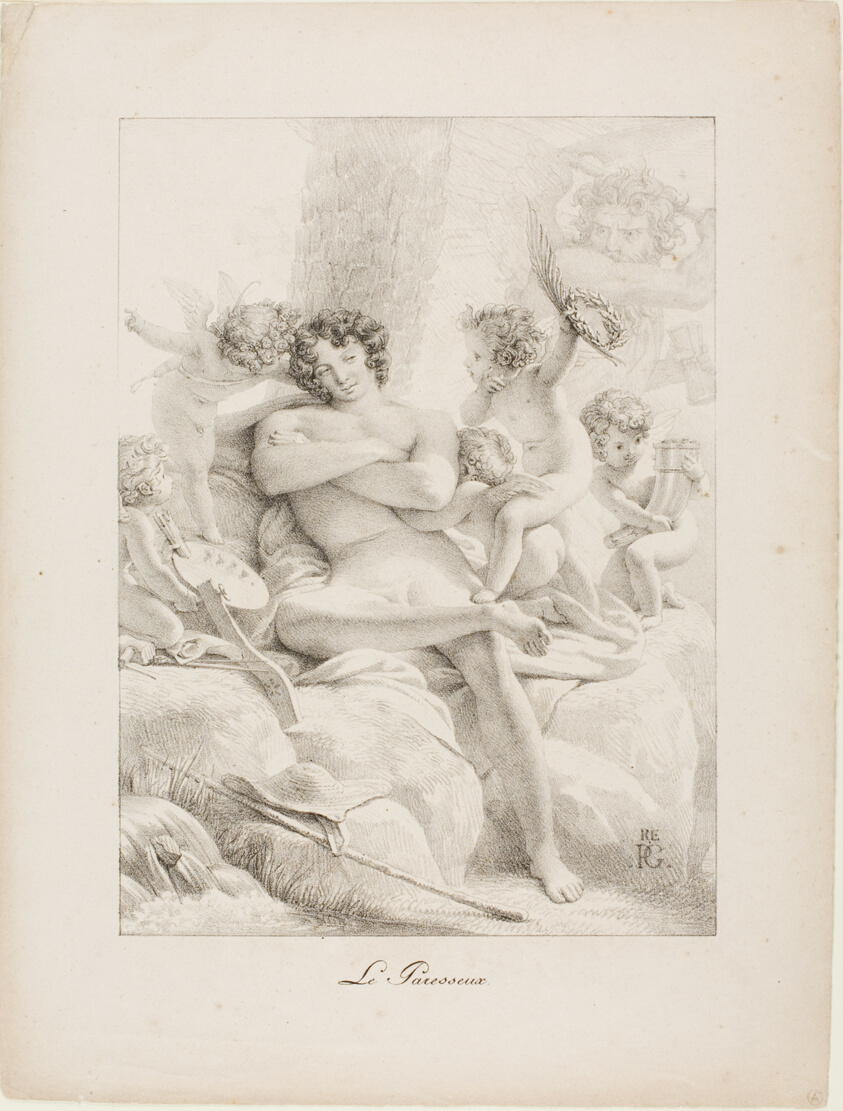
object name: Print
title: The Idler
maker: Pierre Guérin (French, 1774-1833); printed by Gottfried Engelmann (French, 1788-1839)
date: 1816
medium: Lithograph in black on pinkish-cream wove paper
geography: France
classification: lithograph; print; prints and drawing